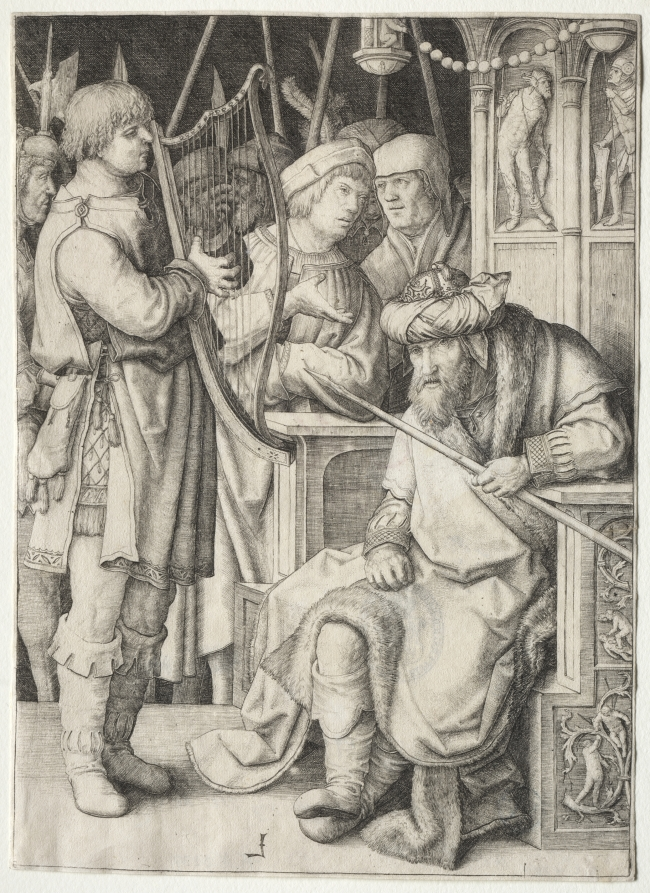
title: David Playing the Harp before Saul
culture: Netherlands, 16th century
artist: Lucas van Leyden (Netherlandish, 1494–about 1533)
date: c. 1508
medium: engraving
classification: Print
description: A skillful player of the harp, David was summoned to the court of King Saul in order to console the king who was often tormented by melancholy. Lucas van Leyden masterfully captured the despair of the king who sits uncomfortably upon his throne, his right foot angled convulsively over the left one, his gaze a blank stare. While playing, David looks calmly upon the ruler, as if to convey his confidence that music will provide the necessary balm to soothe the king’s soul.